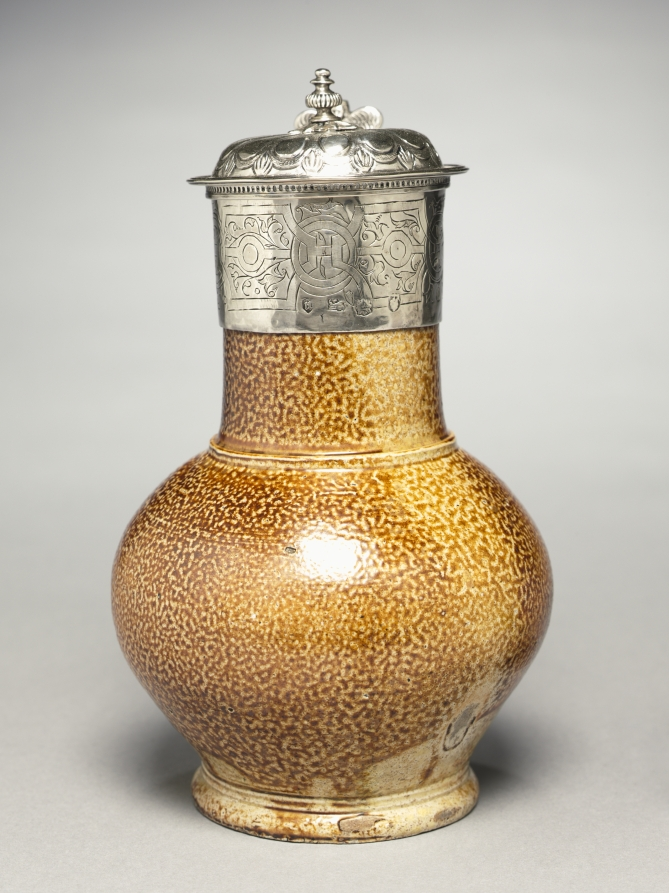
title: Covered Jug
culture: Germany (jug) and England (mounts), 16th century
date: c. 1570–1573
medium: Tigerware, silver mount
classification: Ceramic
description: German Stoneware The production and export of German stoneware reached its peak in the late 1500s. Prized for its durability and stone-like appearance, German stoneware became one of the most widely traded forms of pottery, even finding popularity in early America. The distinctive pebbly glass surface, resembling an orange peel, was achieved by introducing salt into the hot kiln during the firing process. This glaze gave clear definition to the coats of arms or other emblems that often formed the surface decoration on large works, usually jugs.